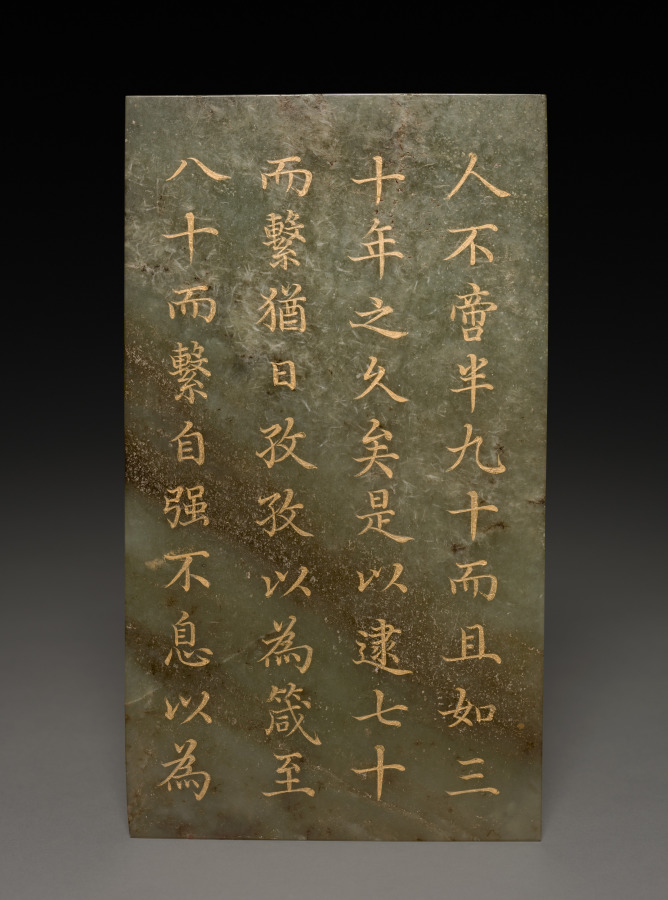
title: Tablet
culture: China, Qing dynasty (1644–1911), Qianlong reign (1736–95)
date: 1778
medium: jade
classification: Jade